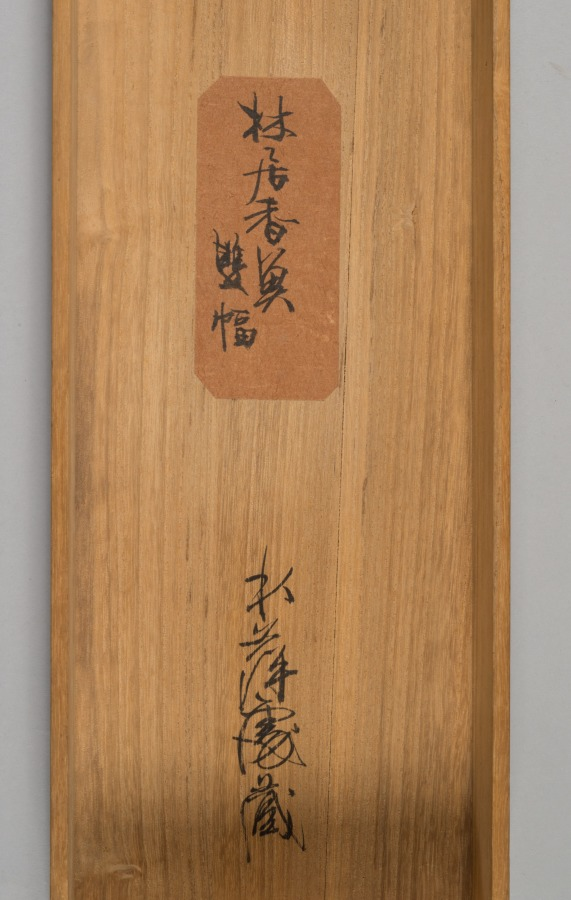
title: Fish and Rock; Fish and Seaweed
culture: Japan, Momoyama period (1573–1615)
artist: Rinkyo (Japanese)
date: 1573–1615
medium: pair of hanging scrolls; ink on paper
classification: Painting